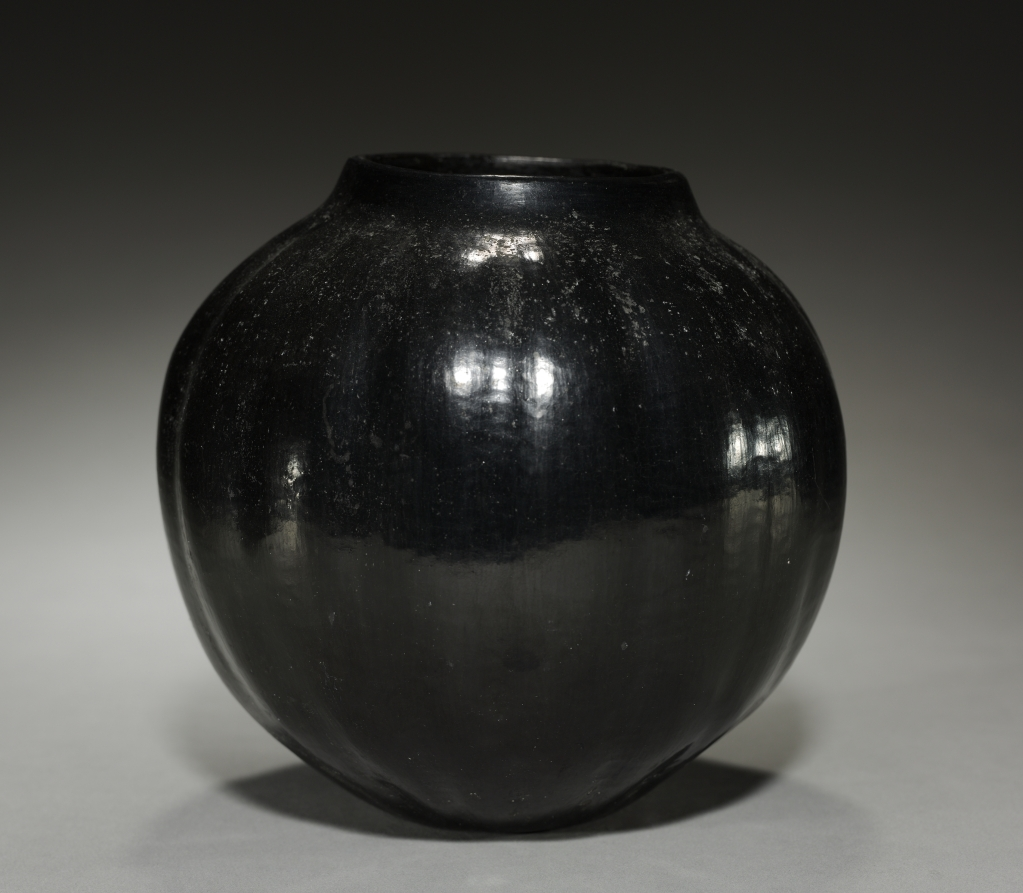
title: Pumpkin-shaped Jar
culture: Southwest, Santa Clara Pueblo, 20th century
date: c. 1900– 1925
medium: black ware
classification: Ceramic